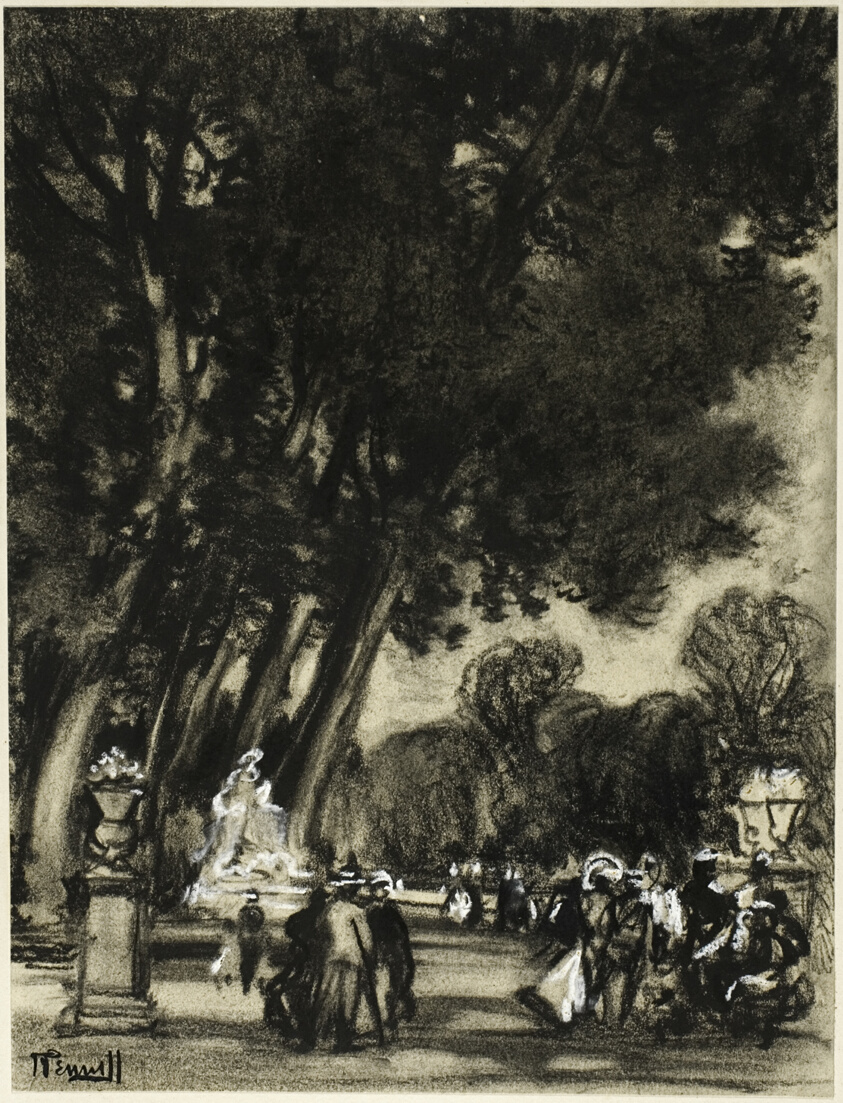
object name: Drawing and Watercolor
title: The Garden of the Island, Aranjuez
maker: Joseph Pennell (American, 1857-1926)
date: c. 1903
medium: Oiled charcoal with stumping and erasing, heightened with touches of white gouache, on cream wove paper, perimeter mounted on off-white wood pulp laminate board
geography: United States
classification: charcoal; drawings (visual works); prints and drawing